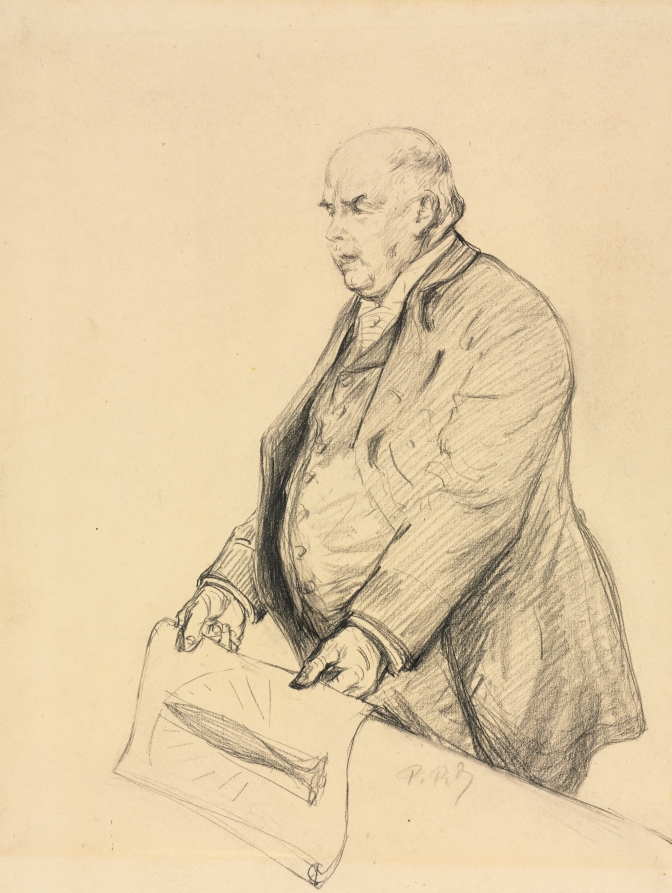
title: Robert Green Ingersoll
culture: France, 19th century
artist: Charles Paul Renouard (French, 1845–1924)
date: fourth quarter 19th century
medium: black crayon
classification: Drawing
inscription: signed, lower right, in black crayon: P. R d ; [by artist ?], across bottom, in black crayon: Mr Robert G. Ingersoll ; across bottom, in graphite: Showing models of torpedoes to the Committee on Appropriations / as 150 ; VERSO OF SECONDARY SUPPORT, upper center, in graphite: A #47 5ºº ; lower left, in graphite: a20986 ; lower right, in graphite: Drawn from life, at Washington, / by Paul Renouard of Paris. ; lower center, in graphite: v/< ; lower right, in graphite: [OX ?][illegible]